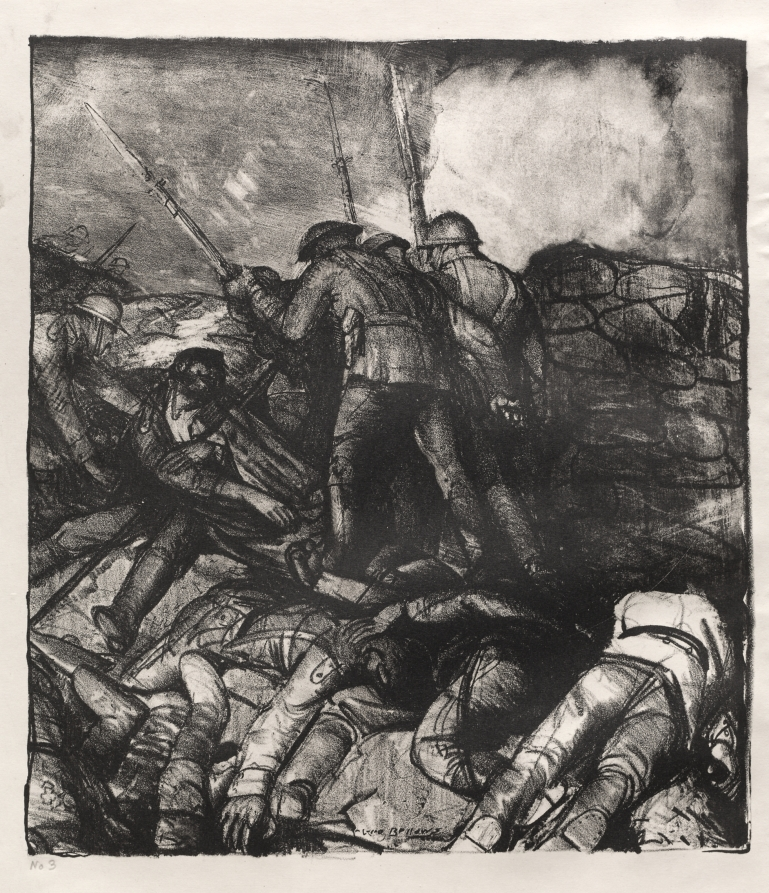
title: War Series: The Charge, Right Detail, first state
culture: America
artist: George Bellows (American, 1882–1925)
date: 1918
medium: lithograph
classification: Print